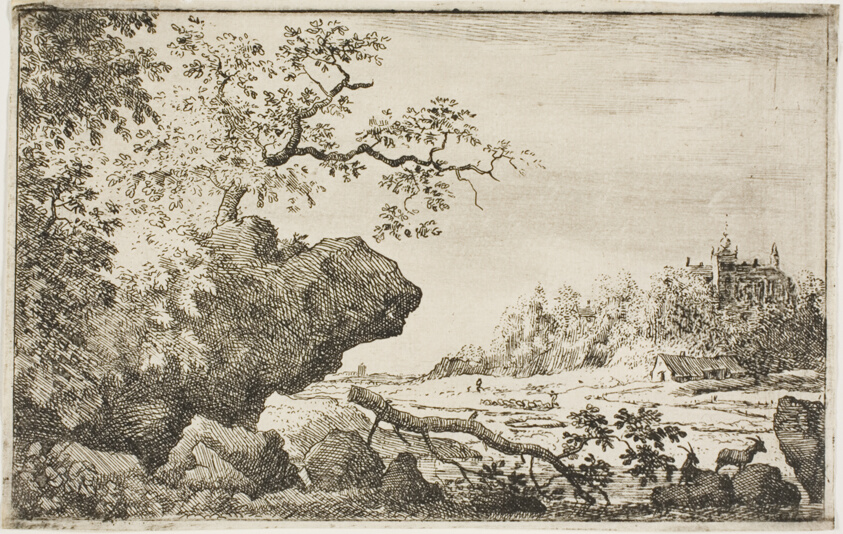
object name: Print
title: Branch of a tree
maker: Allart van Everdingen; Dutch, 1621-1675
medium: Etching on ivory laid paper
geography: Holland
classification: etching; print; prints and drawing